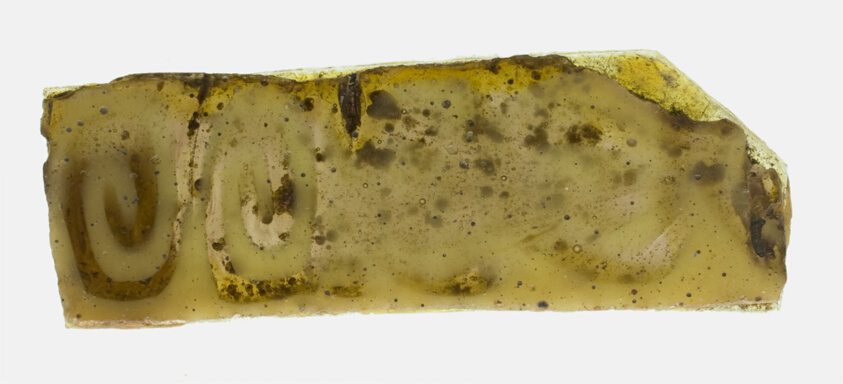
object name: Decorative Arts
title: Fragment of a Plate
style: roman (ancient, style or period), ancient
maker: Roman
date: 1st century BCE–1st century CE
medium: Glass, mosaic glass technique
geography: Roman Empire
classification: fragment; decorative arts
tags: decoration